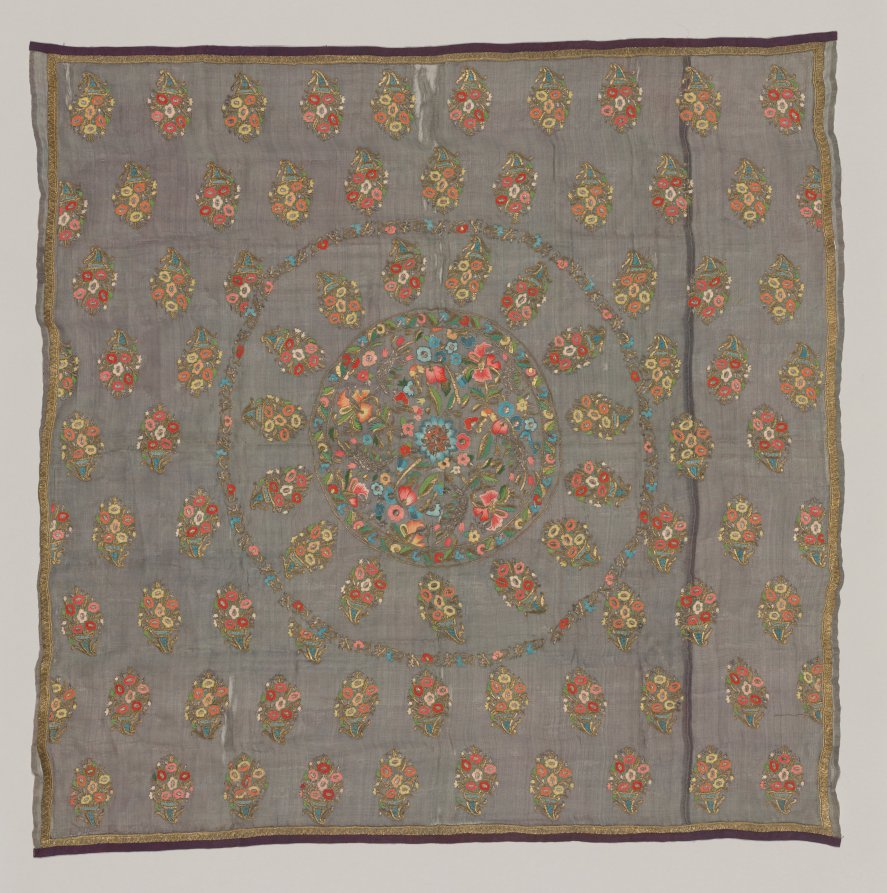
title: Turban cover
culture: Turkey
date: 1700s-early 1800s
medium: plain weave: silk; embroidery, double-running stitch: silk, gilt- and silver-metal thread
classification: Embroidery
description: This exceptionally fine, diaphanous silk turban cover represents the highest quality professional embroidery. Shiny gilt- and silver-metal thread and at least ten colors of silk thread—including newly fashionable pastel tones—create three-dimensional blossoms in the central roundel and multicolored cornucopias on the lavender silk ground. In Turkey, square cloths embroidered with one or two concentric circles in the center of floral fields were generally used to cover stored turbans, a function well served by this elegant cover with weighted golden borders.